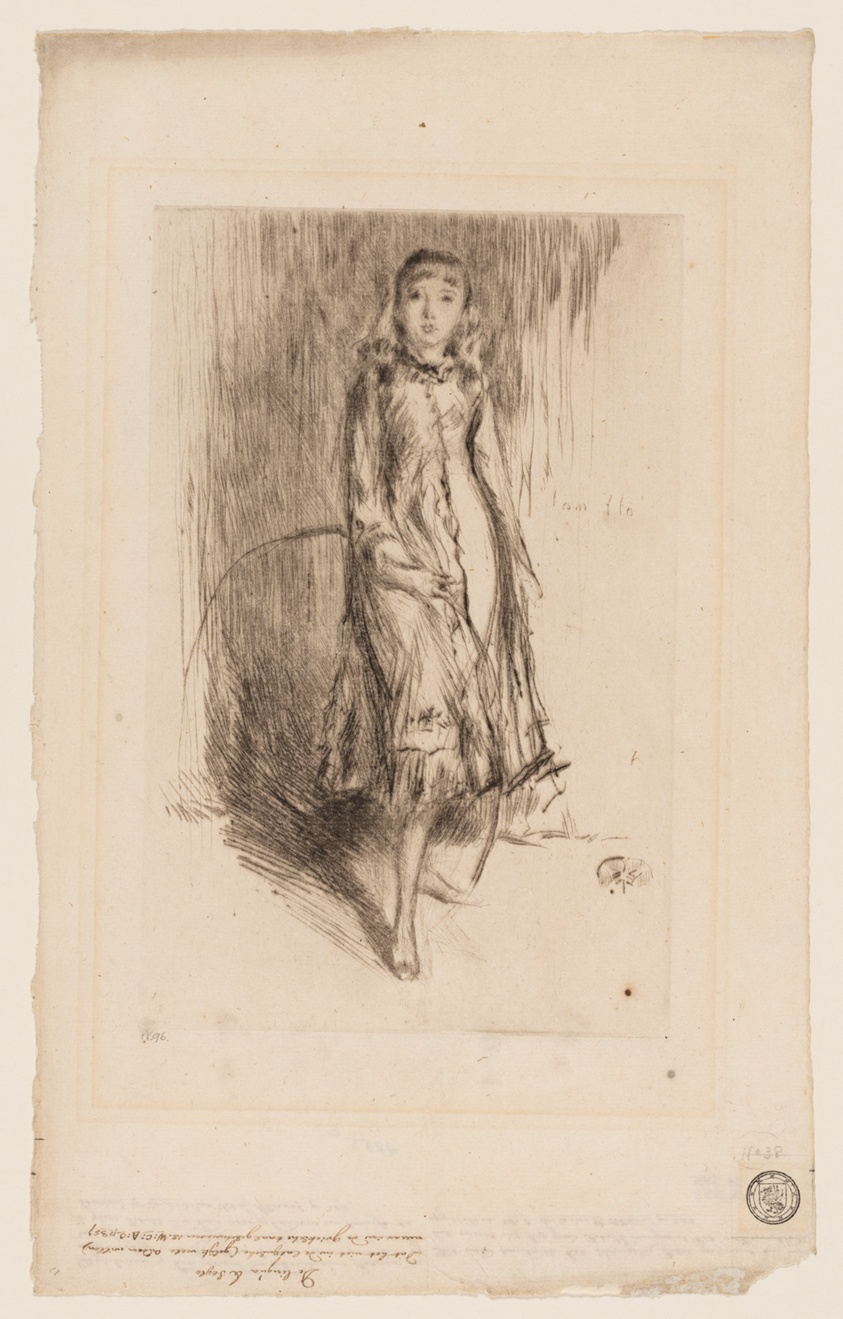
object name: Print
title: Florence Leyland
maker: James McNeill Whistler (American, 1834-1903)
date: 1874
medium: Drypoint in dark brown ink on ivory laid paper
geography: United States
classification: drypoint; print; prints and drawing; paper